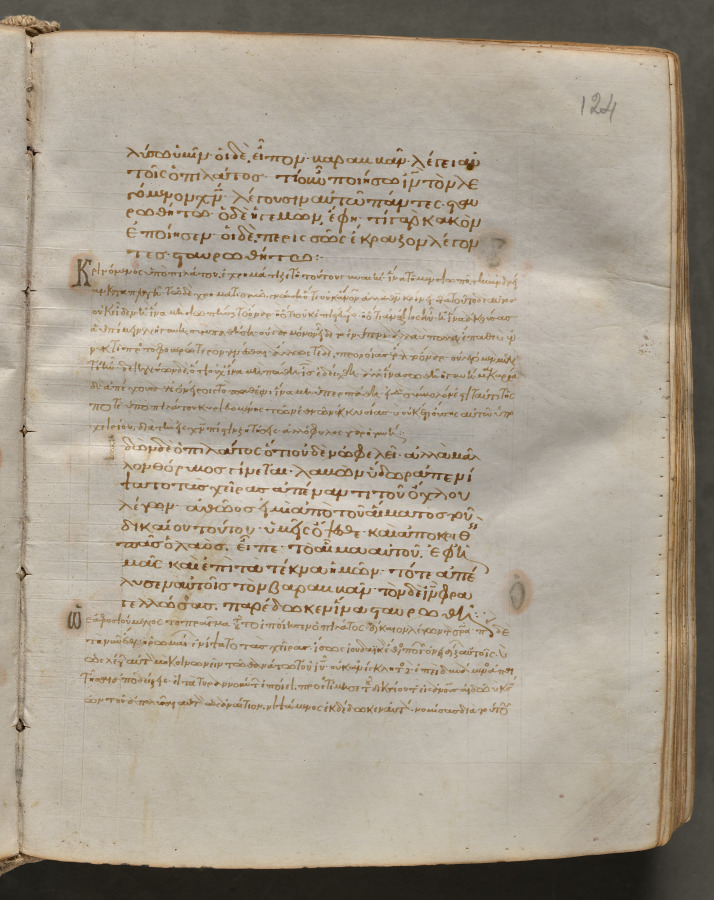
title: Text, folio 124 (recto), from a Gospel Book with Commentaries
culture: Byzantium, Constantinople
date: c. 1000–1100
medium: ink, tempera, and gold on vellum; leather binding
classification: Bound Volume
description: Each of the four gospels in this book opens on a page with brilliantly illuminated borders depicting the author of the text as well as birds-principally peacocks, symbols of the immortality of the soul-and fountains, representing the fountain of life and the salvation of the soul. This volume consists of 428 leaves with texts in Greek. Its level of sophistication suggests that it was probably written and decorated in a monastery in Constantinople.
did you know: Gospel Books were carried in procession through Byzantine churches.